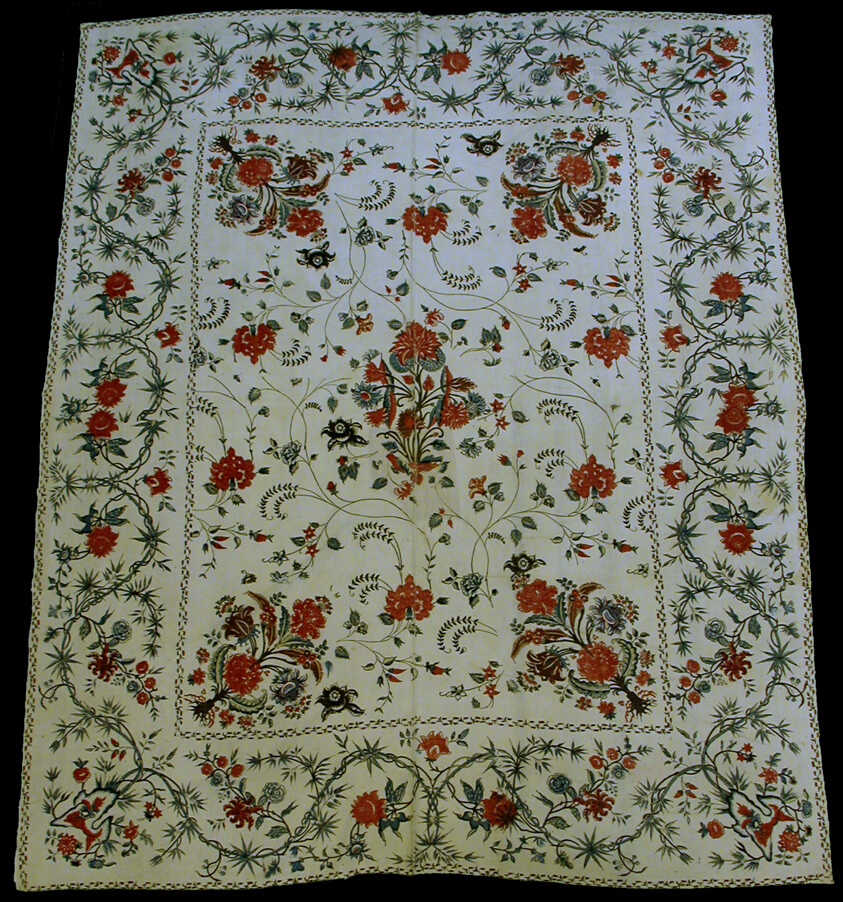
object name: Textile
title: Panel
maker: India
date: 18th century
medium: Two panels joined: cotton, plain weave; block printed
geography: India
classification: textile; weaving - printed